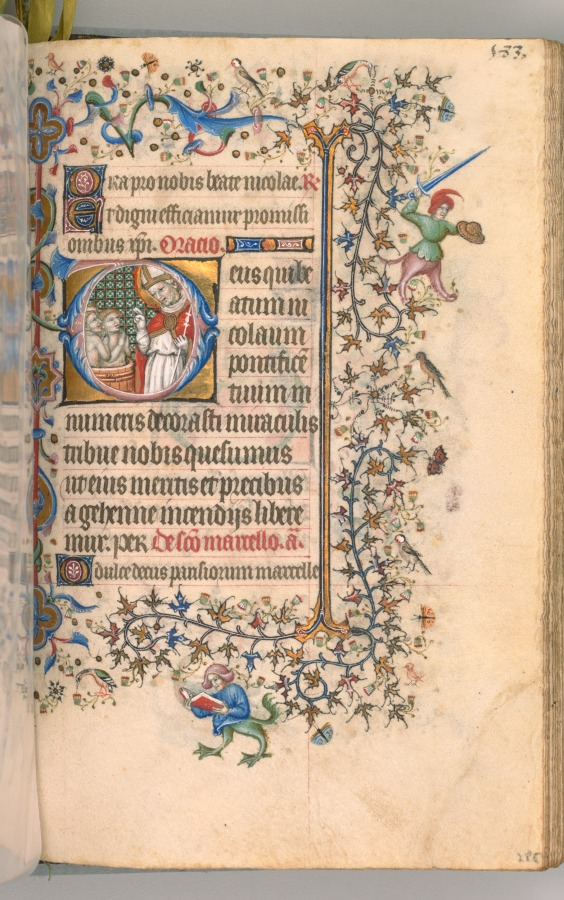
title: Hours of Charles the Noble, King of Navarre (1361-1425): fol. 2865r, St. Nicholas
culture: France, Paris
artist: Master of the Brussels Initials and Associates (French)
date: c. 1405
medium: ink, tempera, and gold on vellum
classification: Bound Volume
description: This precious volume was obviously highly prized by its owner, the French-born King of Navarre, who had his coat of arms painted on no less than twenty folios. Rather than directly commissioning this manuscript from a specific workshop, it seems that Charles the Noble acquired his book of hours -- perhaps ready-made for the luxury market -- while on a trip to Paris in 1404-05. A collaborative effort, six painting styles are evidenced within the pages of this codex, those of two Italians, two Frenchmen, and two Netherlanders. The painter who was responsible for the planning and decoration of the book, and who produced seventeen of the large miniatures, was a Bolognese artist known as the Master of the Brussels Initials. His principal assistant, responsible for most of the borders, was a Florentine who signed his name "Zecho" da Firenze on folio 208 verso.